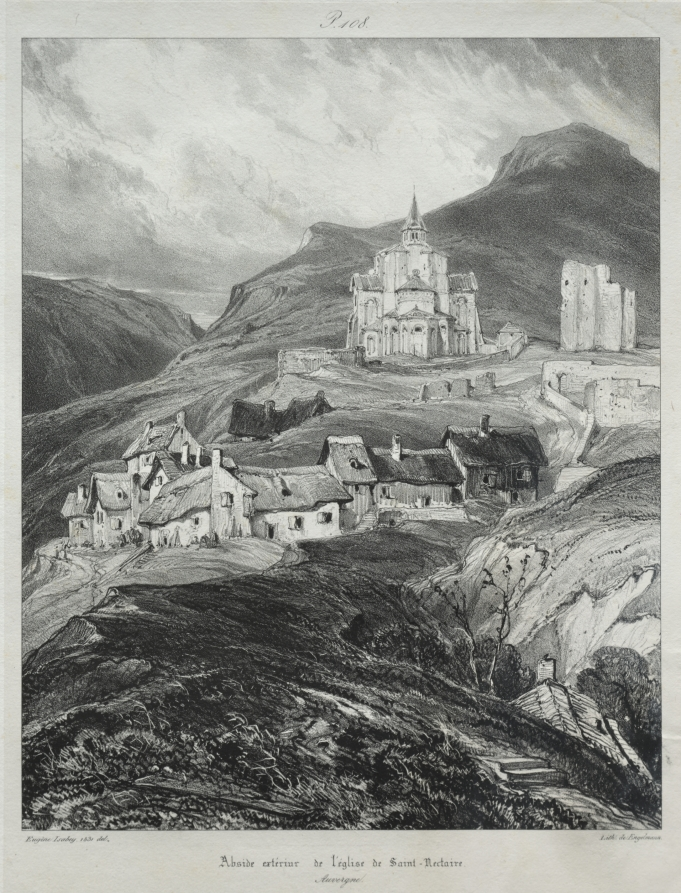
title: Voyages pittoresques et romantiques dans l'ancienne France, Auvergne: Abside de l'église de Saint Nectaire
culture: France, 19th century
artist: Eugène Isabey (French, 1803–1886)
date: 1831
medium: lithograph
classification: Print